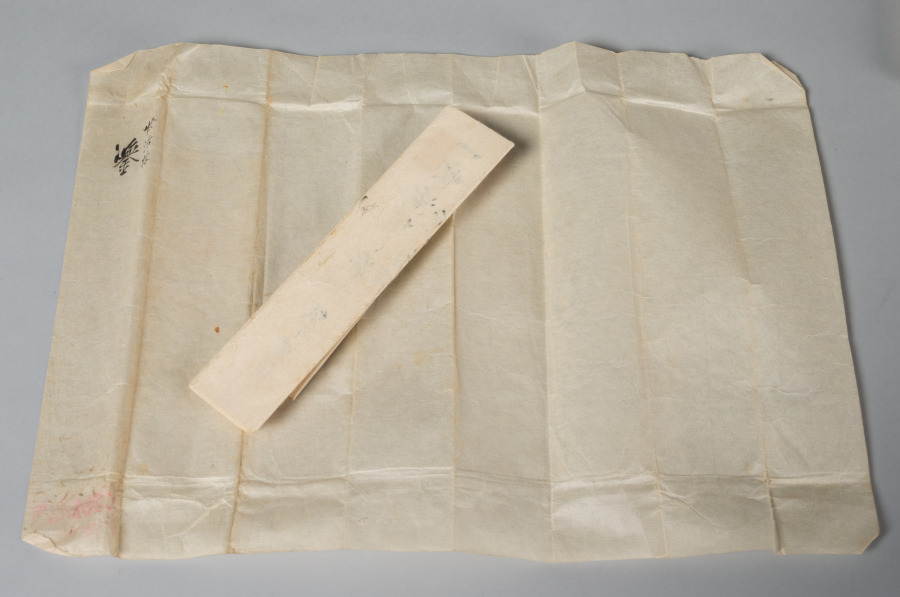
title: Happy Forest, from Water Margin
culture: Japan, Edo period (1615–1868)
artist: Matsumura Goshun (Japanese, 1752–1811)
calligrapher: and Amenomori Shōteki (Japanese, 1731–1786)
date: late 1700s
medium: hanging scroll; ink and color on paper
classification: Painting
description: The Chinese literary classic Water Margin is set in the 1120s and tells the story of 108 outlaws who first rebel against the government and then join forces with it. This painting depicts an episode in which hero Wu Song reclaims the tavern Happy Forest for its rightful owner, the prison warden’s son, Shi En. To prepare for the fight, Wu Song drinks a lot of wine. The painting was inscribed with a quote in which an ally describes Wu Song’s fighting style. It reads as follows: Where his twin fists rise, clouds and thunder roar, When his flying kick comes, wind and rain tremble.